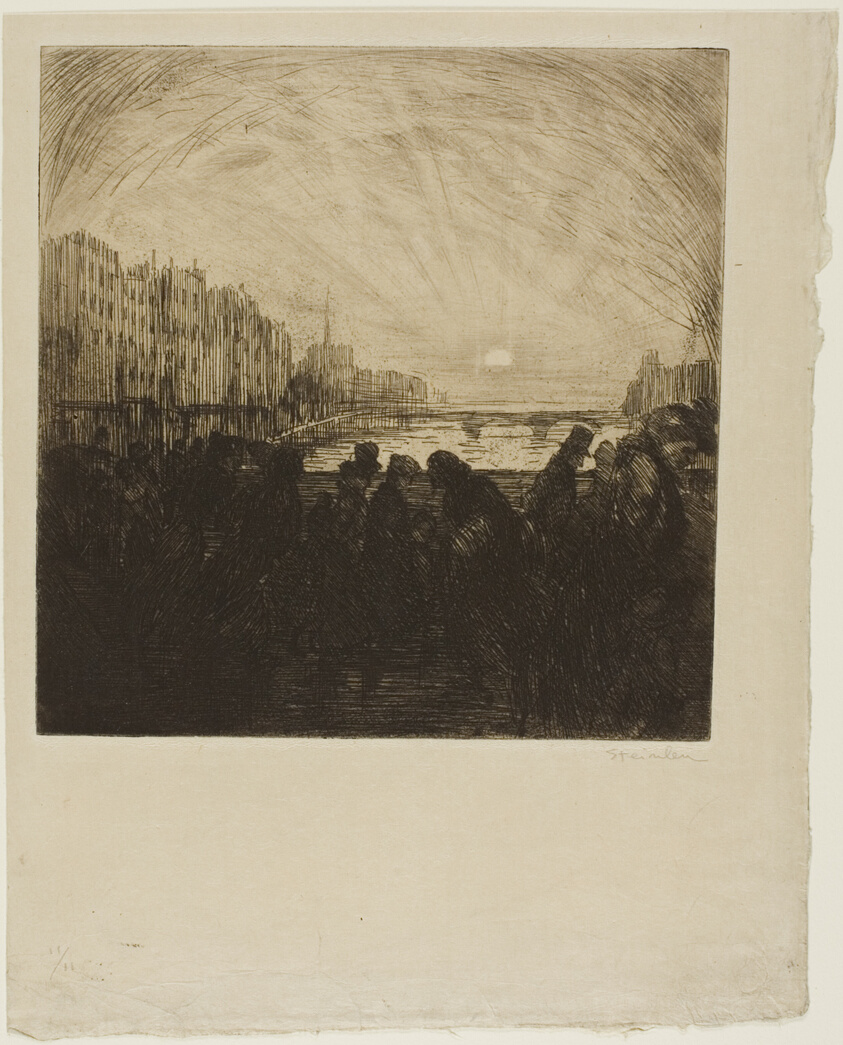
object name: Print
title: Effect of the setting sun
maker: Théophile-Alexandre Steinlen; French, born Switzerland, 1859-1923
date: February 1902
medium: Etching, drypoint and burnishing from a zinc plate on discolored ivory wove paper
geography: France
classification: etching; print; prints and drawing